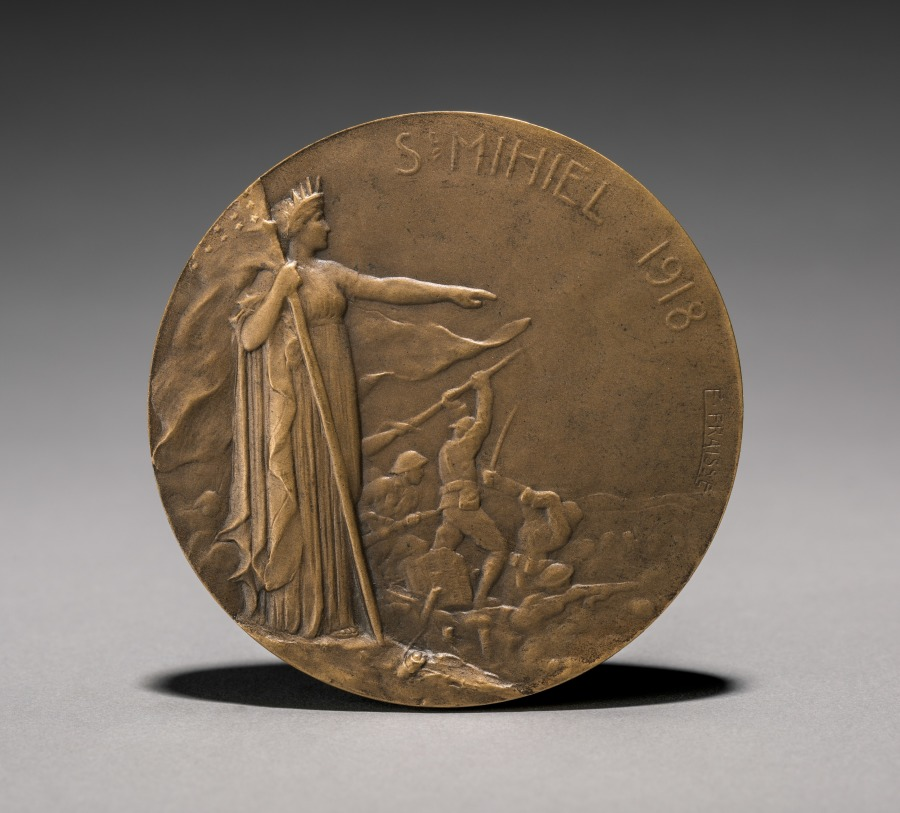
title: Medal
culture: France, 20th century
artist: Edouard Fraisse (French, 1880–1945)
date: 1900s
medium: bronze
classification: Metalwork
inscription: obverse - "St. Mihiel 1918." reverse - "12 - 13 Sept. 1918"; in French and English: "The American Troops operating victoriously in the St. Mihiel secteur broke the resistance of the enemy and captured 13,300 prisoners."